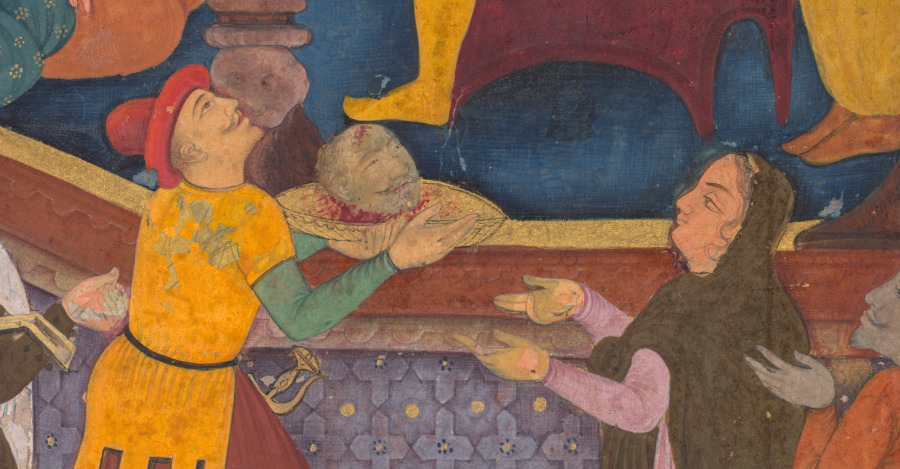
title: Salome Receiving John the Baptist’s Head on a Platter (folio 112 verso), from a Mirror of Holiness (Mir’at al-quds) of Father Jerome Xavier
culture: Mughal India, Allahabad, made for Prince Salim (1569–1627)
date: 1602–4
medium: Gum tempera, ink, color, and gold on paper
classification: Manuscript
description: Herod, King of Judea, sits on a Mughal-style throne as his wife’s daughter Salome reaches for the freshly severed head of John the Baptist. John had offended Herod’s wife, so she took revenge by having her daughter seduce Herod into granting her this wish. Salome is depicted modestly in this painting, and the court musician at the lower left looks on in disgust. The lion head capitals on the pillars above Herod are upside down, seemingly in disapproval of the debauched king.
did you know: Column capitals in Herod’s palace have angels seated on upside-down lion heads.